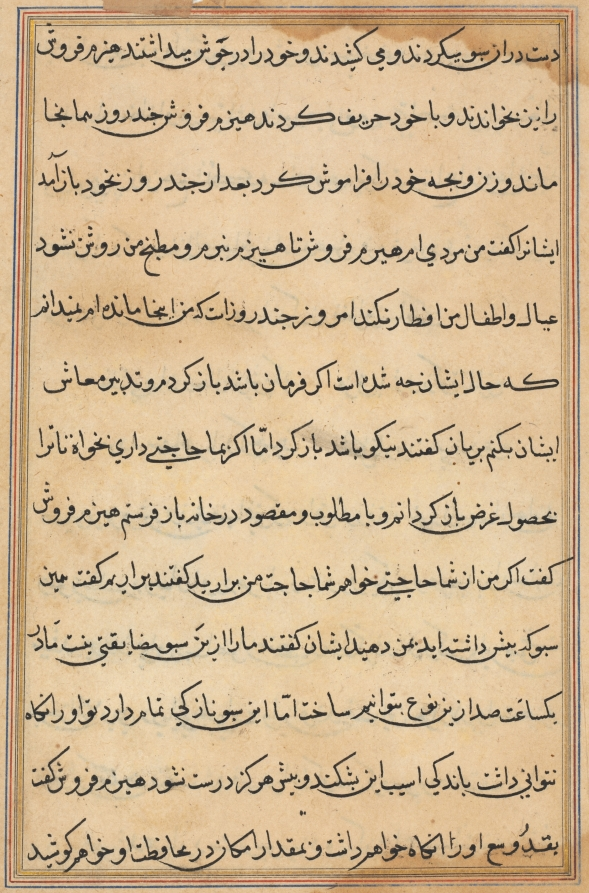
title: Page from Tales of a Parrot (Tuti-nama): text page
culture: Mughal India, court of Akbar (reigned 1556–1605)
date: c. 1560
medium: gum tempera, ink, and gold on paper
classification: Painting